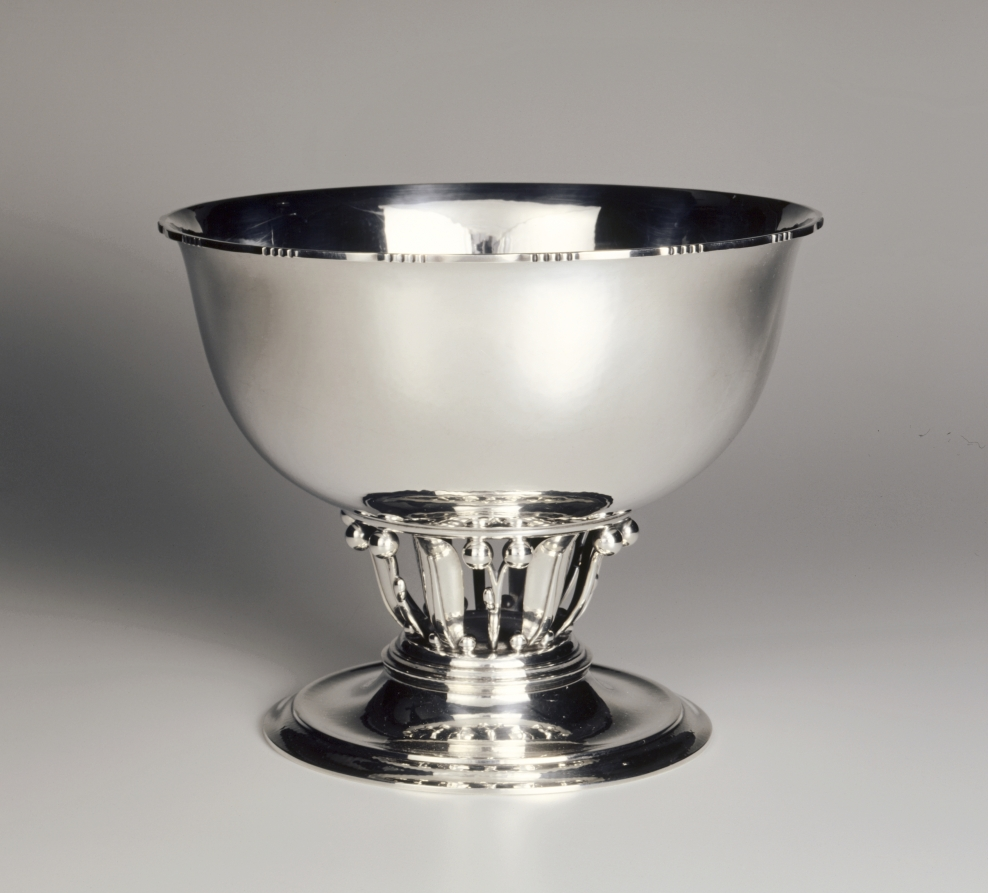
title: Bowl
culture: Denmark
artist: firm of Georg Jensen (Danish, 1866–1935)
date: 1955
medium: silver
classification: Silver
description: The Danish silversmiths at the firm of Georg Jensen have produced some of the most distinguished silver pieces of the 20th century, combining a conservative modern style with traditional techniques of crafts-manship. The bowl bears the following inscription: "Walter and Esther Doxsey, from the members of the American Steel Warehouse Association, with esteem and affection, May 24, 1955."